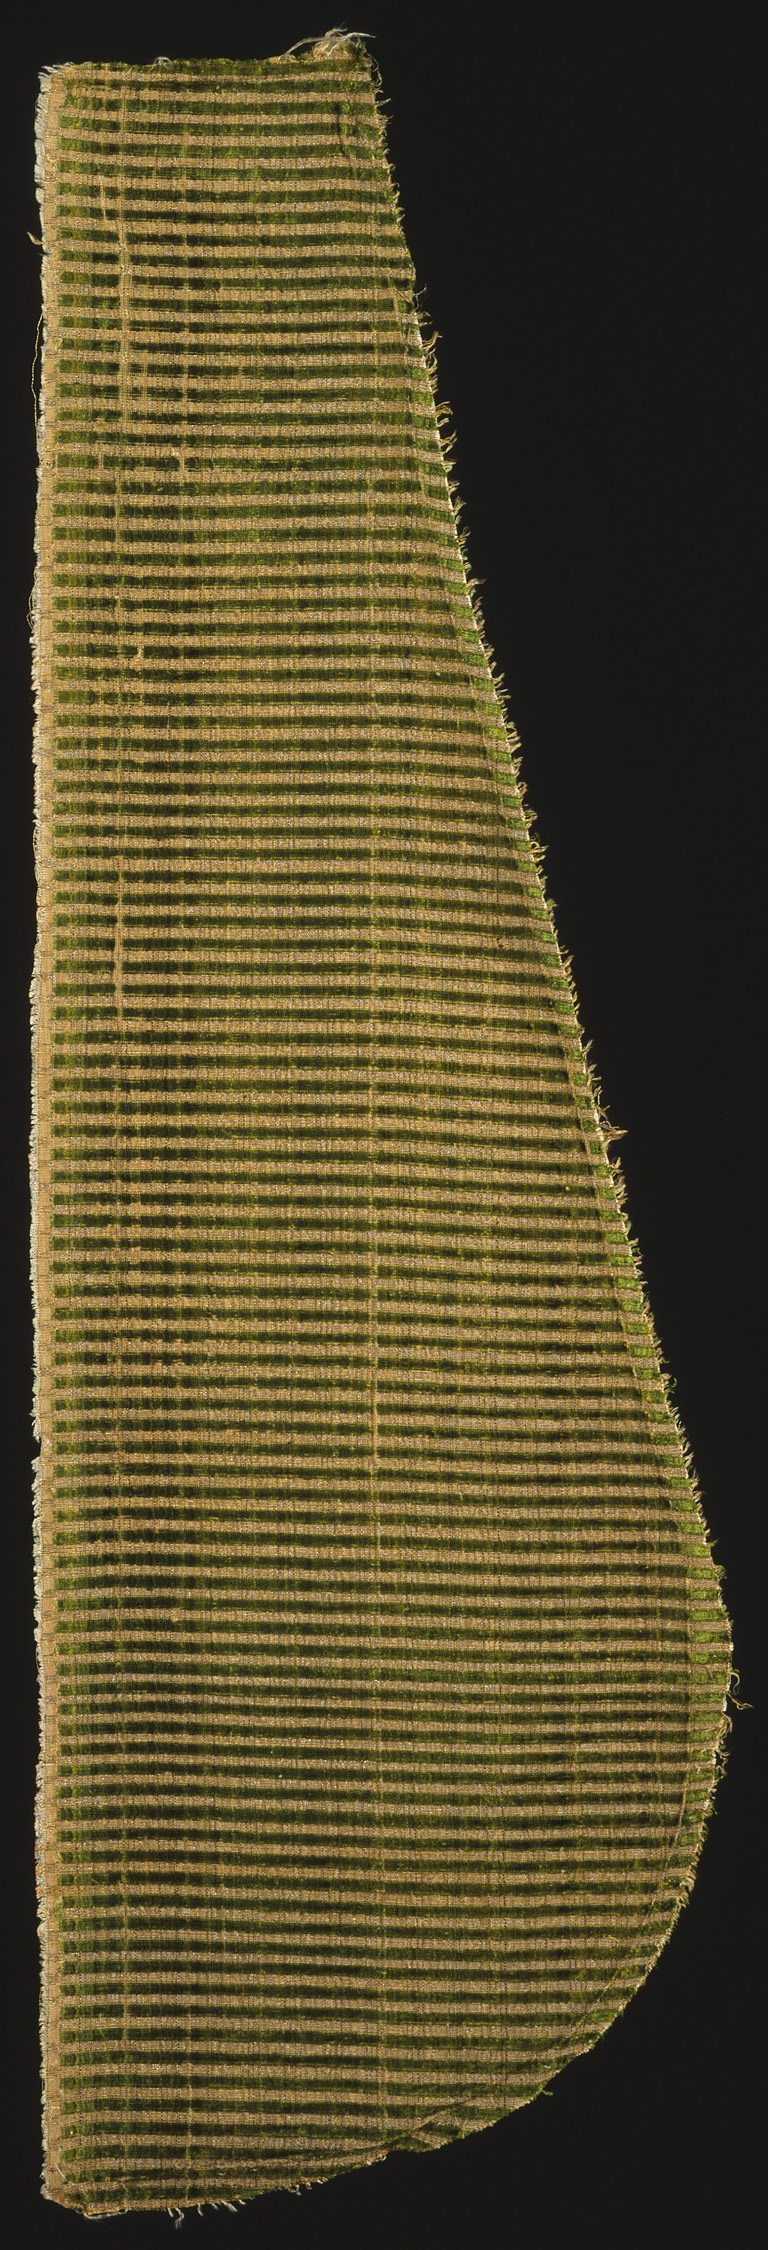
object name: Textile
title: Fragment from a Chasuble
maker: Italy, Florence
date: 1550/75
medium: Silk, plain weave with gilt-metal-strip supplementary facing wefts and supplementary pile warps forming cut and uncut voided velvet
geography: Florence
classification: textile; weaving - velvet; liturgical